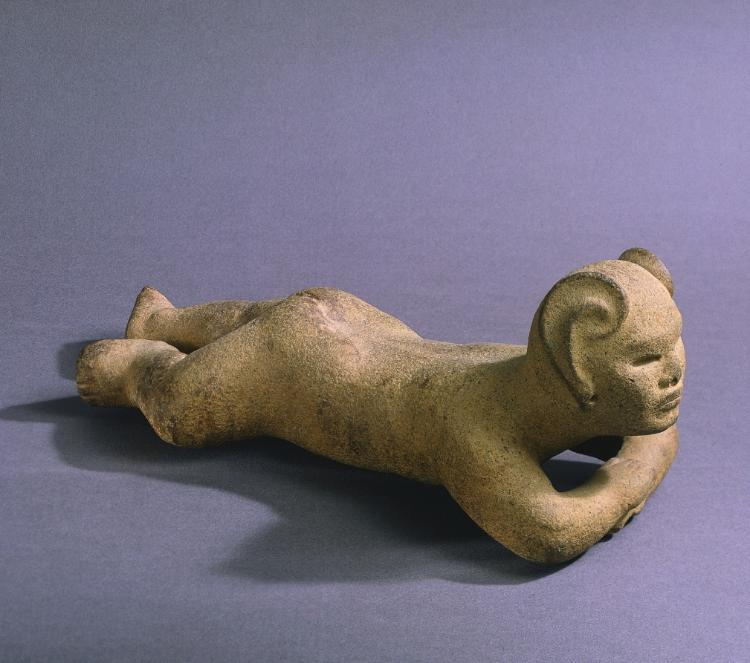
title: Reclining Figure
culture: Mexico, Gulf Coast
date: 300–600 CE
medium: stone, pigment traces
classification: Sculpture